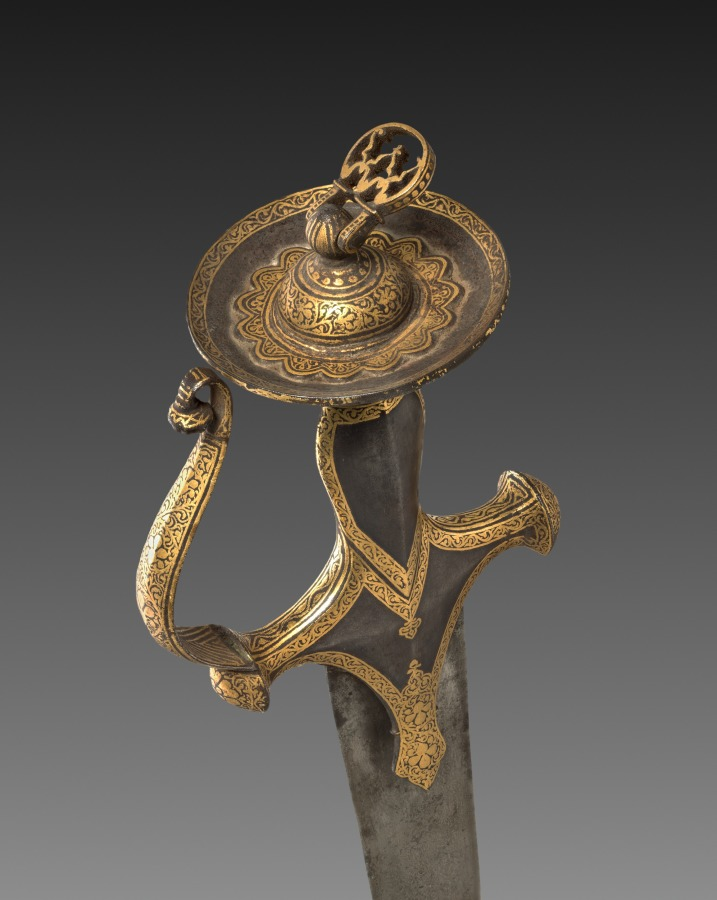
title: Silapa Sword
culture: India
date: 1700s–1800s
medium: gold with inlay and leather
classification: Arms and Armor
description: The exceptionally thin, curved blade is made of watered steel. The grooves, called fullers, allowed for weight reduction and prevented flexion. The costly hilt is fully overlaid with brass in steel, both inside and outside the knuckle.